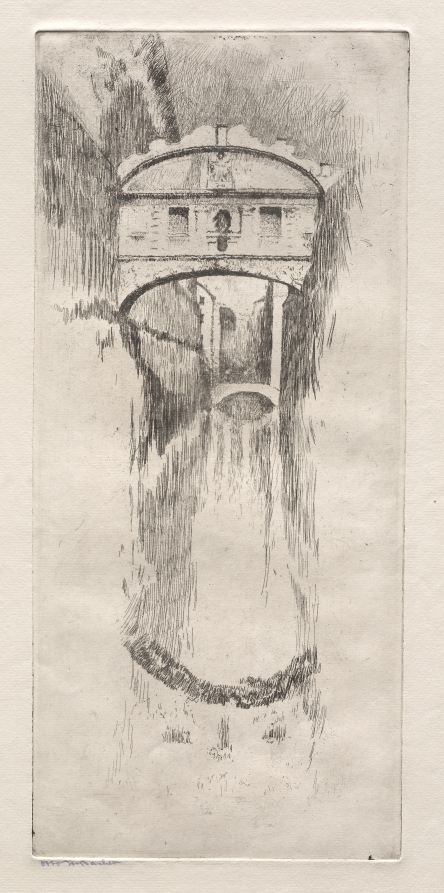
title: Etchings of Venice: Bridge of Sighs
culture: America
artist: Otto H. Bacher (American, 1856–1909)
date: 19th century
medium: etching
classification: Print